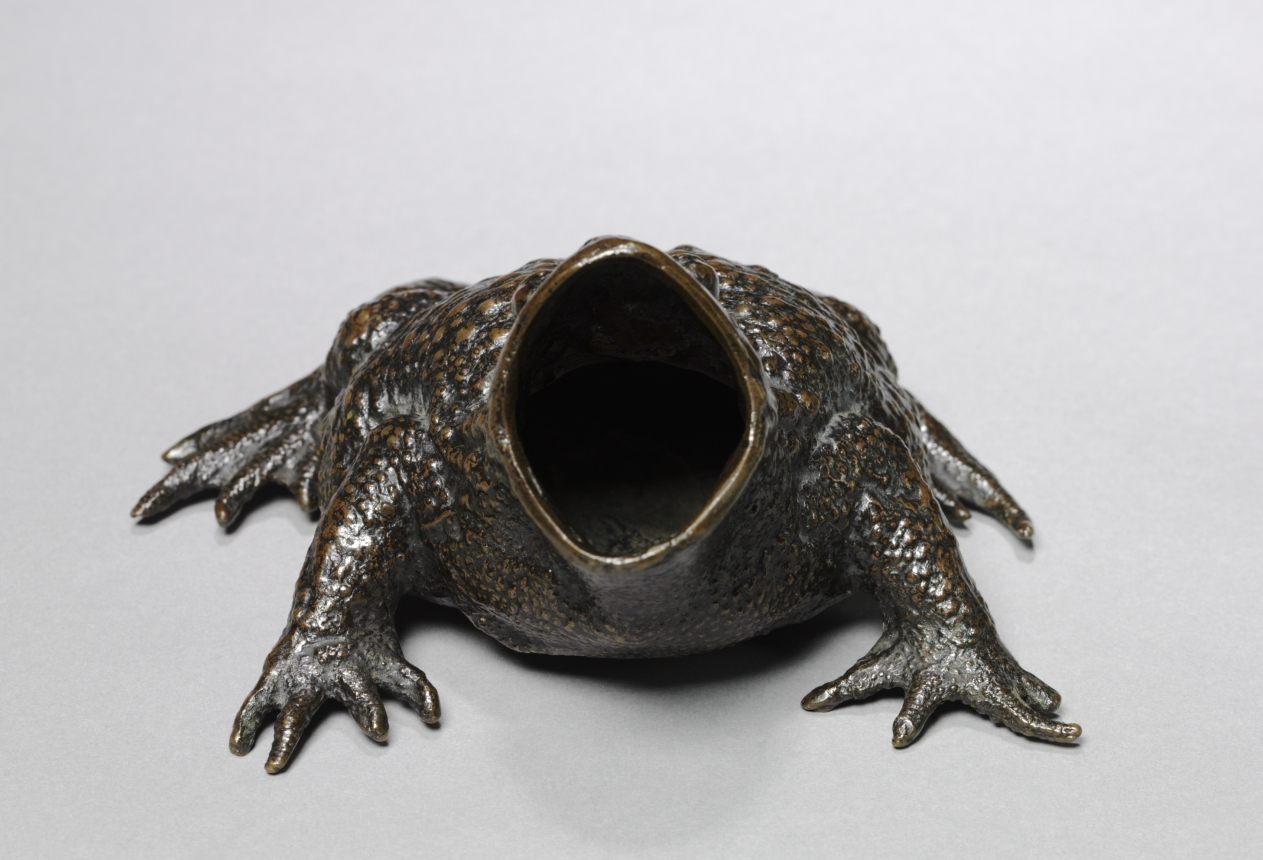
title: Toad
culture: Italy, possibly Padua, 16th century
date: c. 1500–1550 or later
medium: bronze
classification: Sculpture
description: Casting animals from life was a common Renaissance practice, connected to scholars’ interest in natural history and a taste for oddities. Drowning the toad in ammonia left the animal’s body intact. The workshop then manipulated the head, opened the mouth, and cast the creature as a functional object for the study.